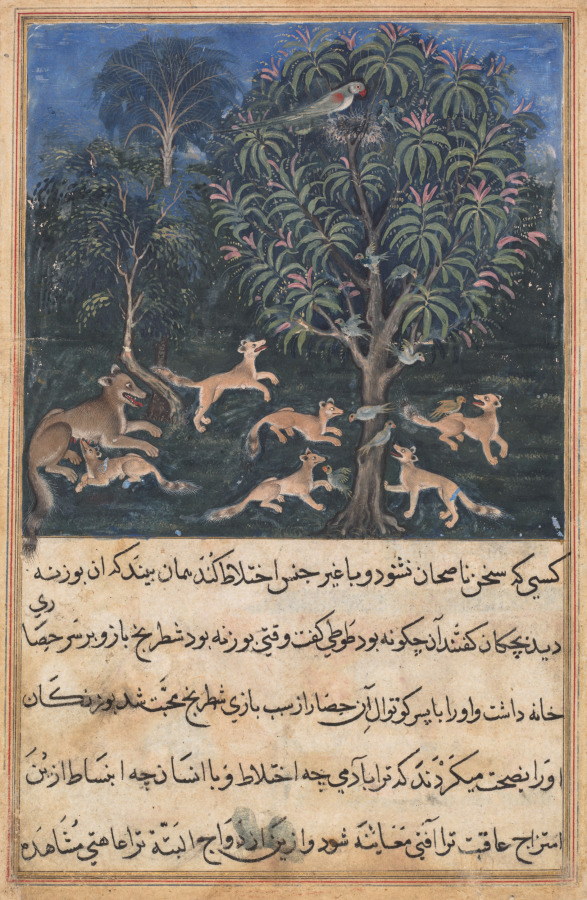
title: The parrot mother cautions her young on the danger of playing with foxes, from a Tuti-nama (Tales of a Parrot): Fifth Night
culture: Mughal India, court of Akbar (reigned 1556–1605)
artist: Dasavanta (Indian, d. 1584)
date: c. 1560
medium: gum tempera, ink, and gold on paper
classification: Painting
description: One night the parrot Tuti tells Khujasta that he hopes her relationship with her new lover does not wind up being only half-baked, like the medical treatment of the king of Kamarupa. She asks what that was about, and Tuti begins the story by telling of a mother parrot who lived in the forest with her young, who liked to play with the fox cubs who lived at the base of the tree. The mother parrot is perched on the edge of her treetop nest.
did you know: A fox cub suckles contentedly, as the mother keeps a sharp eye on the others.